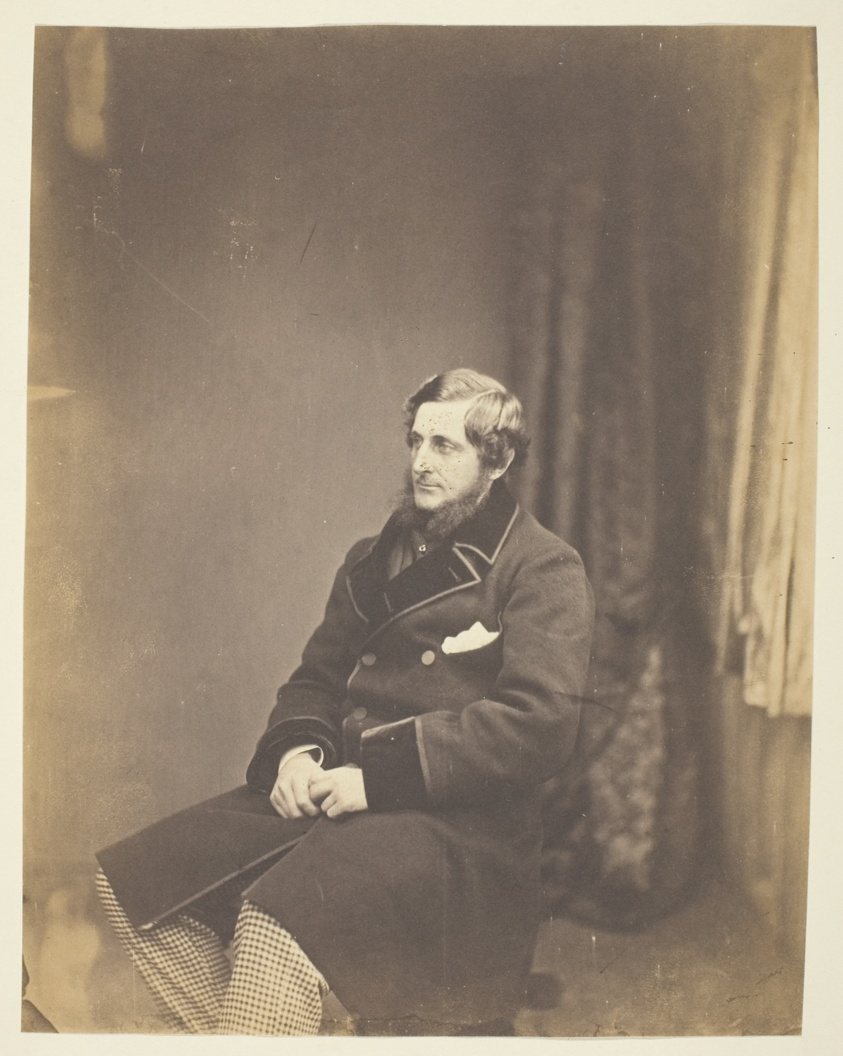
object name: Photograph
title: Sir J. Montagu Steele (1820-1890), Military Secretary, Crimea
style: 19th century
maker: Roger Fenton (English, 1819–1869)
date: 1855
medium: Thinly albumenized print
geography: England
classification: albumen silver print; photographic process; photography; photograph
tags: Collected by Hugh Edwards